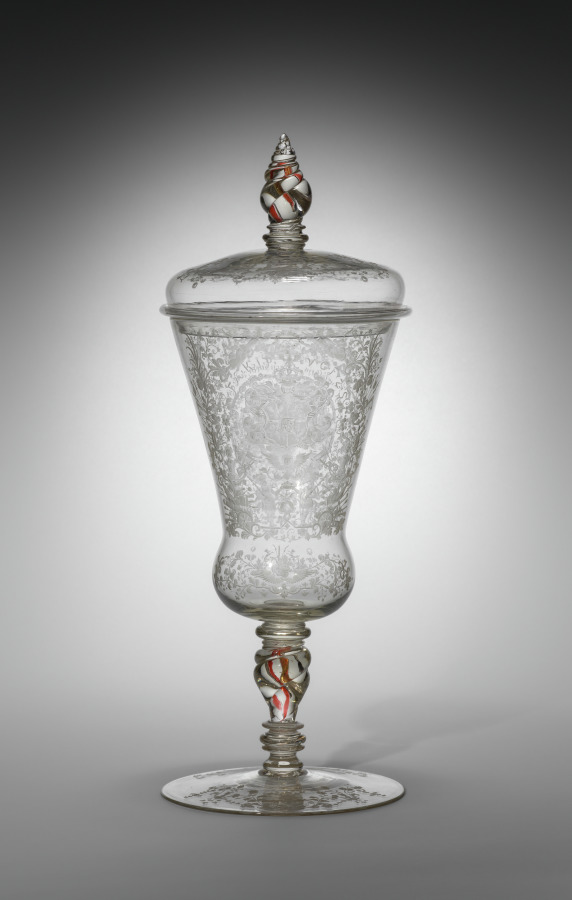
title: Standing Cup with Cover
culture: Bohemia, 18th century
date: c. 1715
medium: glass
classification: Glass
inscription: the German inscription engraved around the hunting scene translates as: When sorrow torments us enjoy a glass of wine and also the joy of a hunt; engraved on the opposite side: F.A.K.J.P.V.C.F.Z.S. (Friedrich August Keonig in Polen und Chur Fuerst zu Sachsen).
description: Engraved with arms of Saxony-Poland and Hunting Scene.